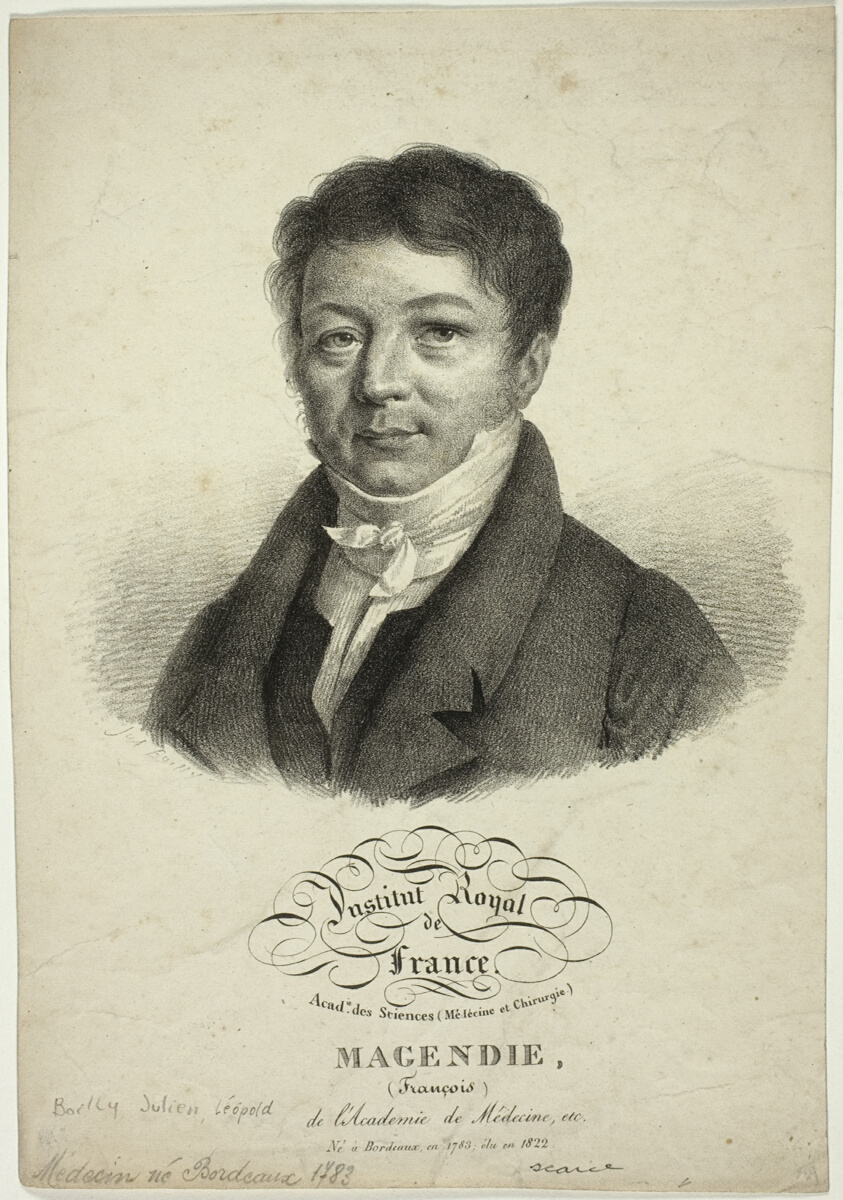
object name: Print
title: Portrait of François Magendie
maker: Jules Boilly (French, 1786-1874)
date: c. 1822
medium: Lithograph in black on ivory wove paper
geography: France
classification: lithograph; print; prints and drawing